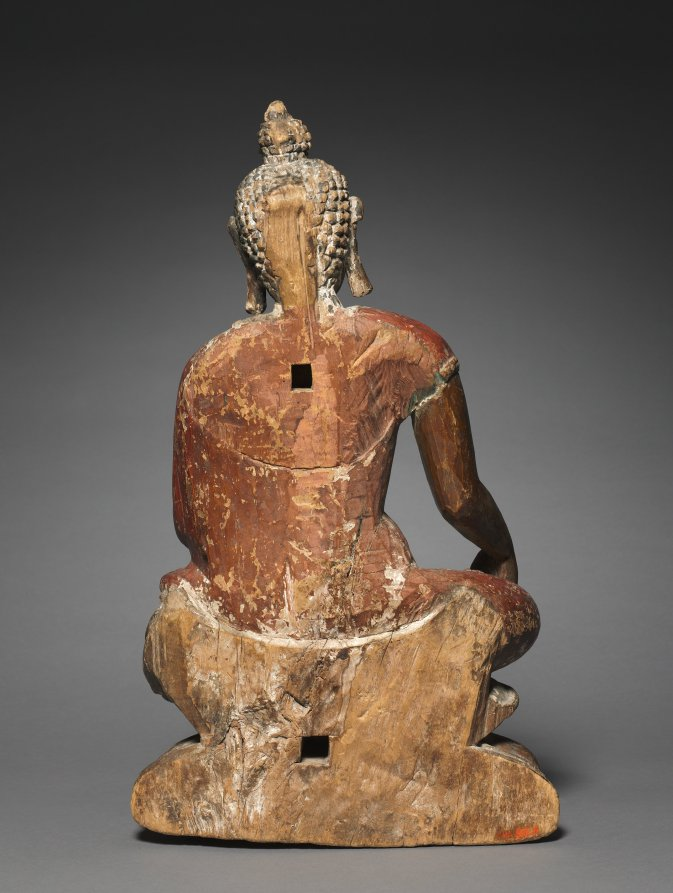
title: Seated Buddha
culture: Western Himalayas, possibly Ladakh or Lahul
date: 1000s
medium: painted wood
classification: Sculpture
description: Eleventh-century western Tibet experienced a period of fervent reconstruction of Buddhist monasteries following the persecution of Buddhism during the 9th and 10th centuries. Art from Kashmir was avidly collected and copied as part of those reconstruction efforts. Kashmiri stylistic traits, such as the pinched waist and abdominal musculature seen in this rare wooden image, are from that critical time. The pioneering Italian Tibetologists Giusseppe Tucci and Egenio Ghersi discovered this sculpture during an expedition to Tibet from 1933 to 1935